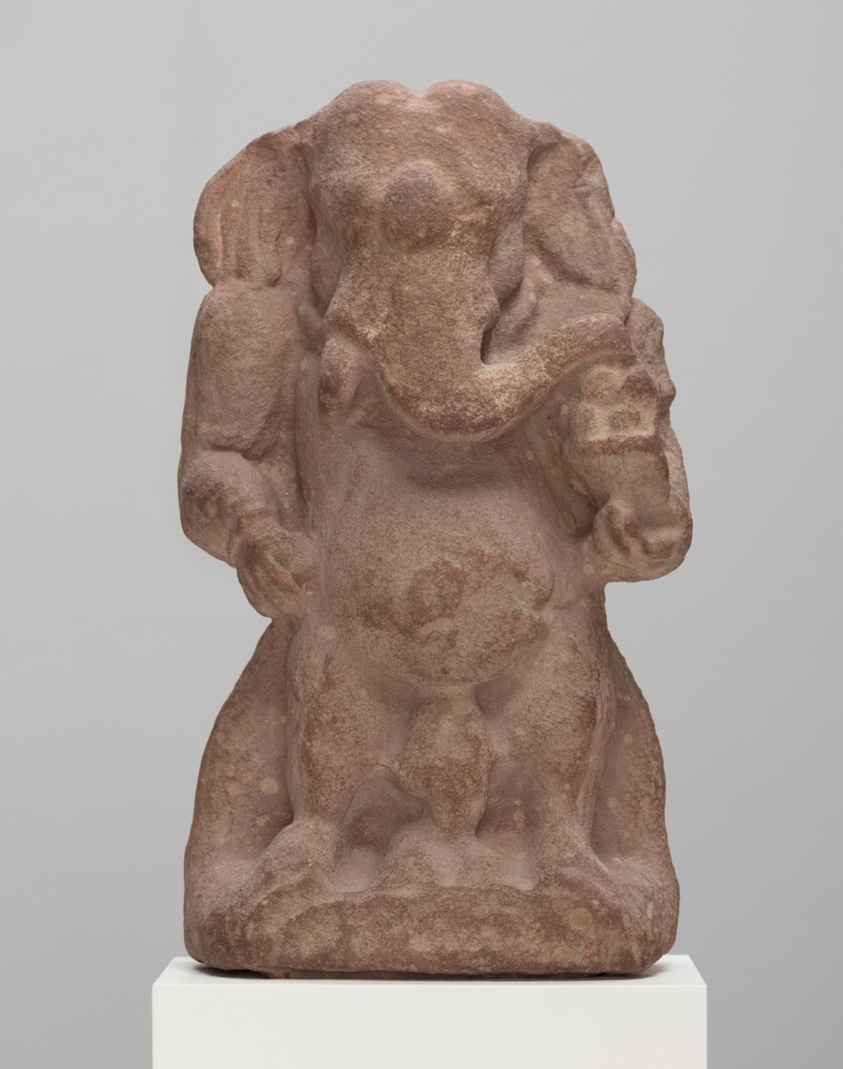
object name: Sculpture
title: Two-Armed God Ganesha Holding a Bowl of Sweets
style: South Asian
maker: India; Uttar Pradesh, Mathura region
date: c. 3rd/4th century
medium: Sandstone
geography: Mathura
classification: sandstone; stone; sculpture; asian art